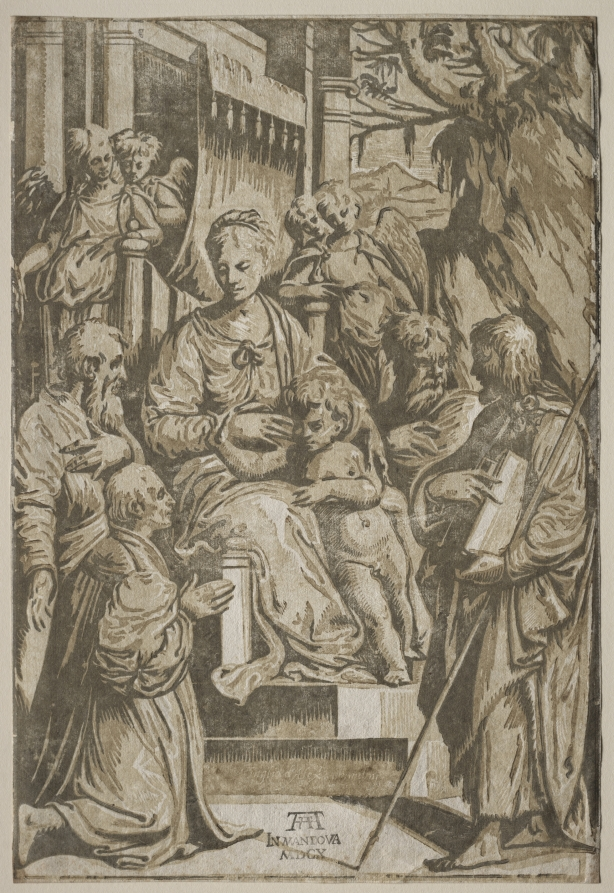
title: The Virgin and Child with Saints and a Donor (after a drawing by Girolamo da Treviso)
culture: Italy, 16th century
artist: Andrea Andreani (Italian, about 1558–1610)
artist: Alessandro Gandini (Italian)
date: c. 1610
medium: chiaroscuro woodcut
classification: Print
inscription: Inscribed on the step throne, in the lighter tone block: Taglio d'Alex.' Ghandini Lower center, monogrammed: A (ndrea) A(ndreani) / IN MANTOVA / MDCX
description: This chiaroscuro woodcut was printed from three blocks in ochre and brown. It was likely based on a preliminary monochrome drawing for an altarpiece oil painting made by Girolamo da Treviso for the Boccaferri family chapel in the basilica of San Domenico in Bologna.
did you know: A notarial document of 1564 refers to the artist of the print, Alessandro Gandini, as a "matematico" (mathematician), suggesting that Gandini likely dabbled in printmaking as an amateur rather than a professional practitioner.